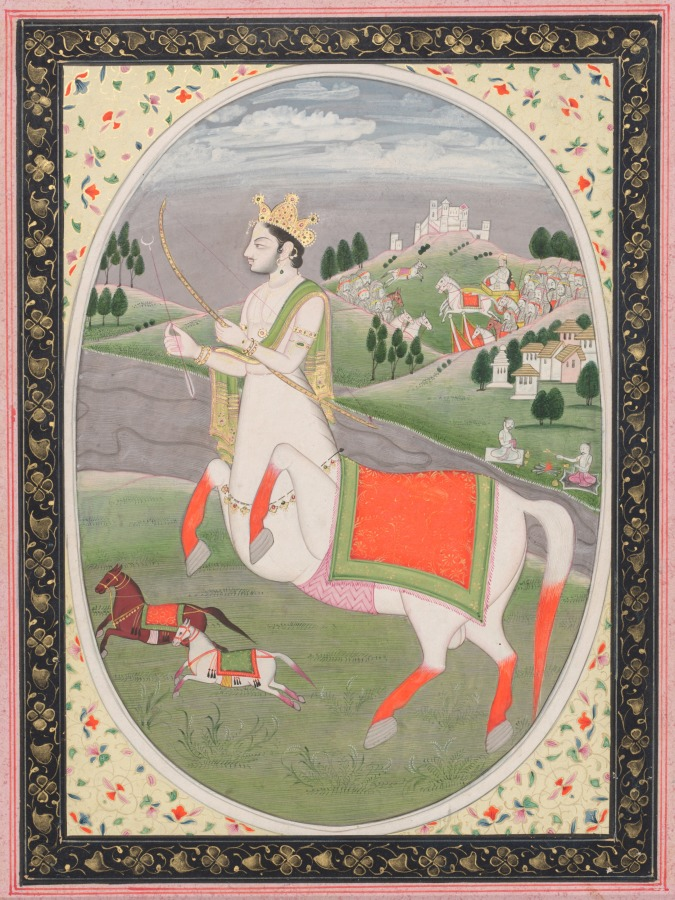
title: Sagittarius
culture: Northern India, Pahari kingdoms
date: c. 1810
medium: gum tempera and gold on paper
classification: Painting